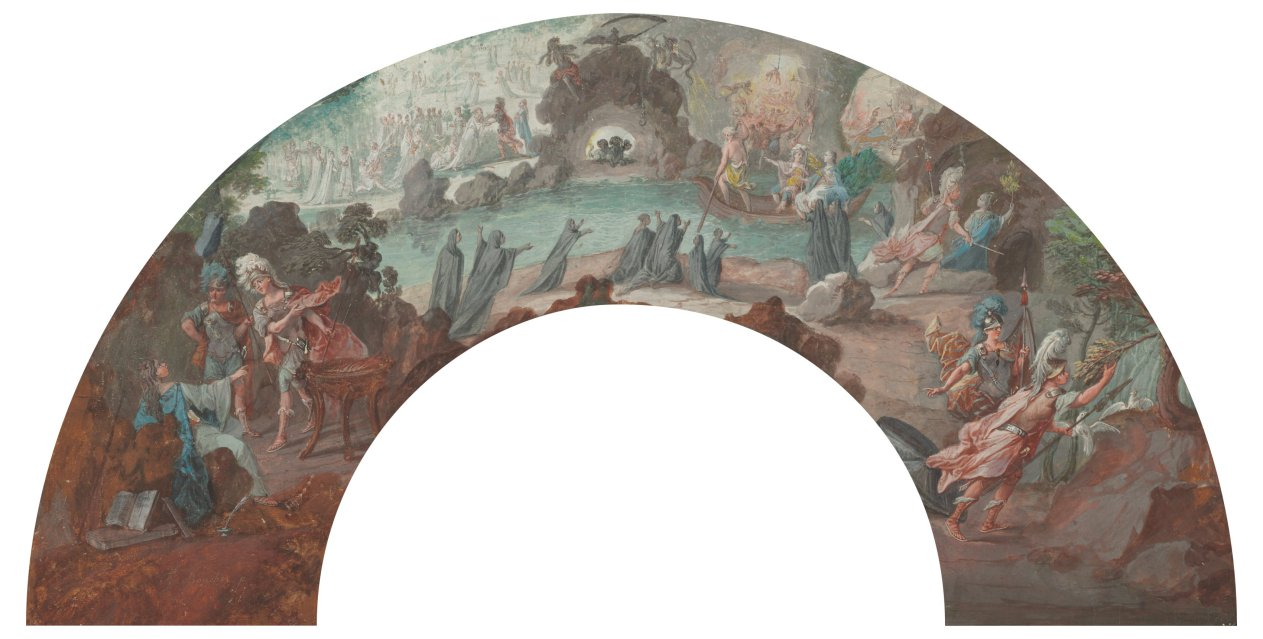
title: Aeneas in the Underworld, Design for a Fan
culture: France, 18th century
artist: follower of François Boucher (French, 1703–1770)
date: after 1730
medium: watercolor and gouache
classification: Drawing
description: Both practical and fashionable, fans were essential accessories for elite European women in the 1700s. Often decorated with elaborate motifs, a fan could reveal information about its wearer. It might expose a woman’s artistic or literary tastes, divulge her politics, or disclose her knowledge of current cultural conversations. The design seen here represents an episode from The Aeneid, a Latin epic poem, suggesting the owner’s interest in recent translations of classical poetry. It could also operate as a metaphor for the Enlightenment: seen entering a cave at right, the hero, Aeneas, travels through the underworld where he faces harrowing challenges and converses with the dead before emerging newly enlightened and victorious.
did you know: The 1700s is often considered to be a golden age of fan design.